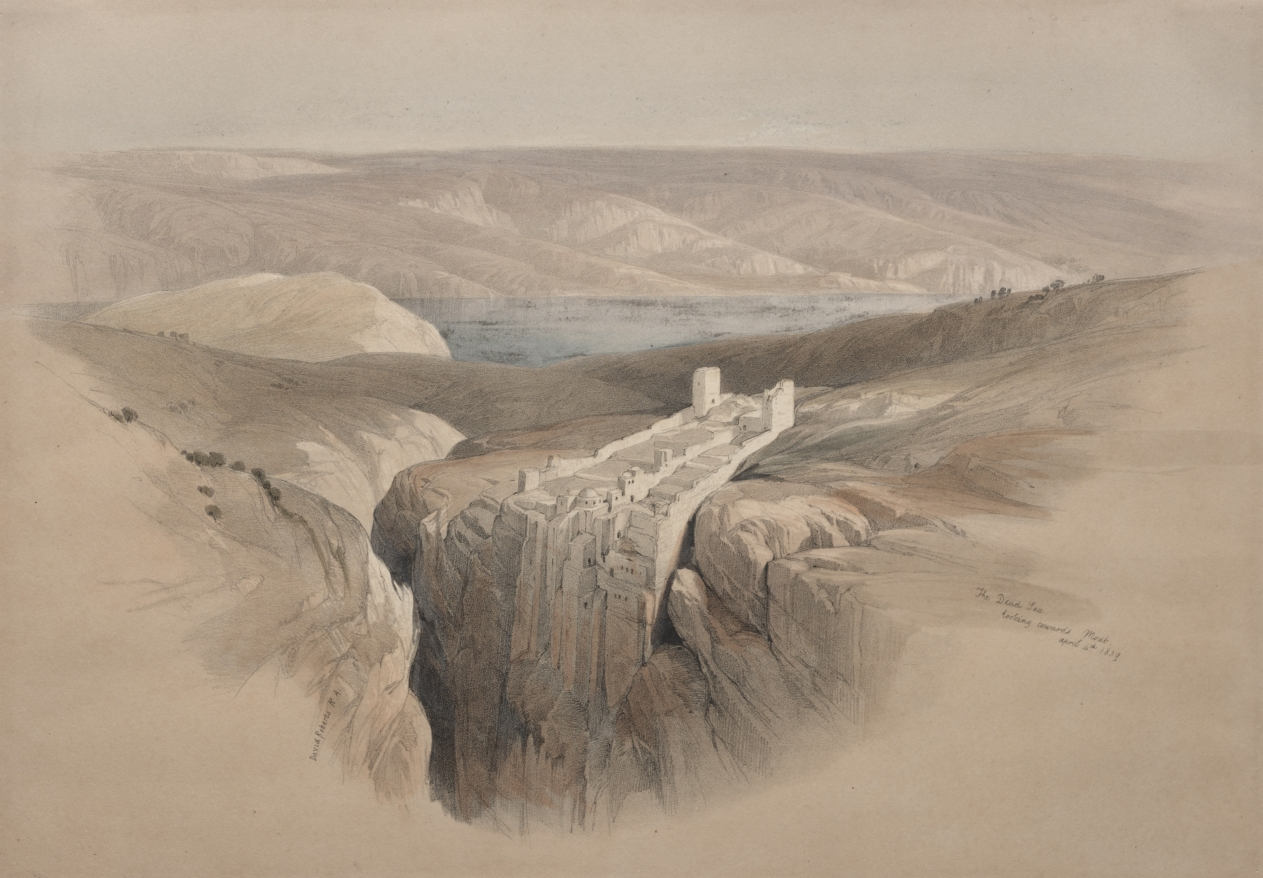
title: The Dead Sea Looking Towards Moab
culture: England, 19th century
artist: David Roberts (Scottish, 1796–1864)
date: 1839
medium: color lithograph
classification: Print